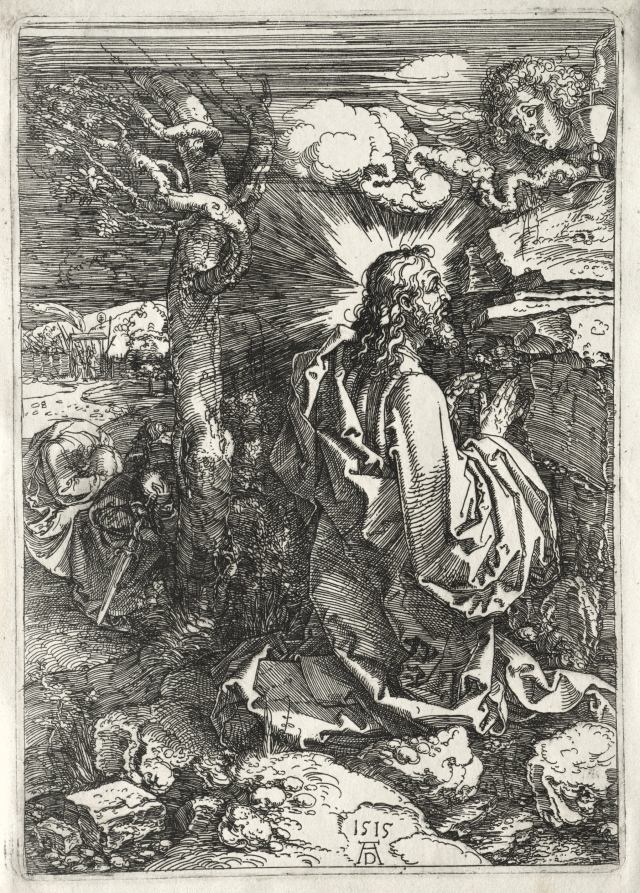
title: Christ on the Mount of Olives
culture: Germany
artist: Albrecht Dürer (German, 1471–1528)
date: 1515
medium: etching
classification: Print